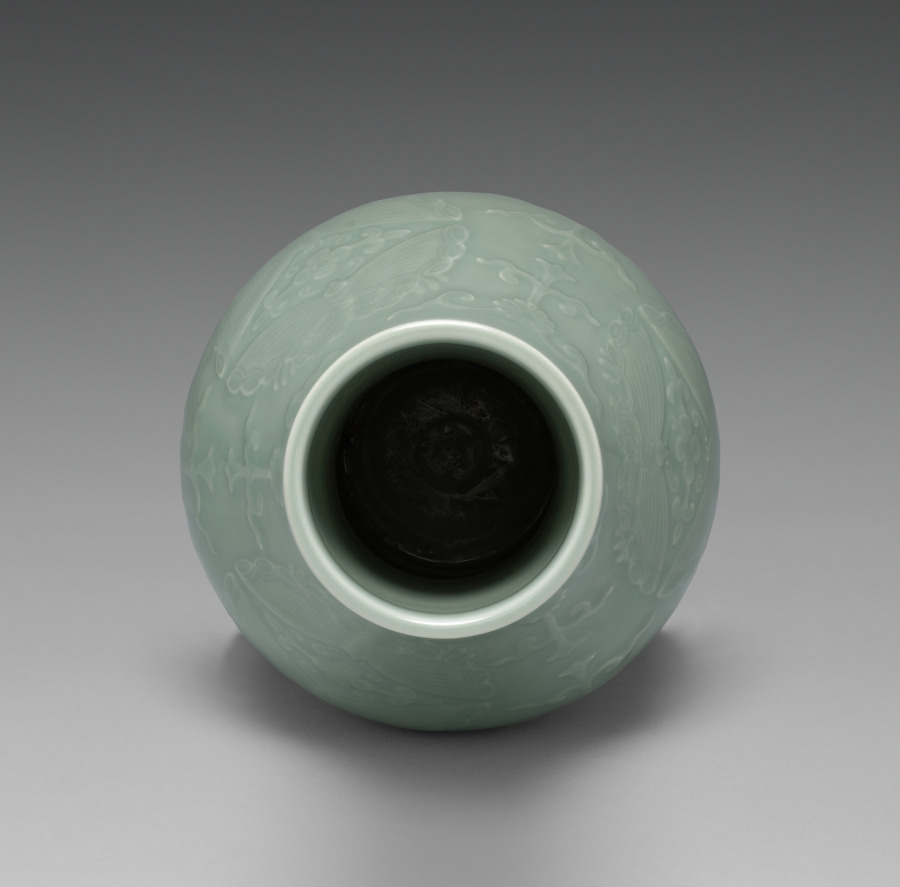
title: Flower Vase with Butterflies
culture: Japan, Meiji period (1868–1912)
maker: Seifū Yohei III (Japanese, 1851–1914)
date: 1907–14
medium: Porcelain with green glaze and carved and molded design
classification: Ceramic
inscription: 清風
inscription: 【印】 帝室技芸員。 【印】 清風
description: This flower vase has two pairs of butterflies forming low-relief roundels, one on each side. The butterflies face each other, one positioned above and the other below, their antennae curling up to a centrally placed floral motif. In the spaces between the pairs of insects, additional raised floral designs are set within vinelike extensions reminiscent of open metalwork banners and canopy adornments in Buddhist temples. The lip and the foot of the vase remain white, and the thinning of the green glaze within the higher-relief portions of the body decoration accentuates the designs. This work, like the sweets bowl CMA 2022.232, has a box lid attribution to Yohei III by Yohei IV. His inscription is dated to the autumn of 1919.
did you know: The box identifies the vase as in the hisokuyō (Chinese mise yao 秘色窯), or “mysterious color ware,” style.